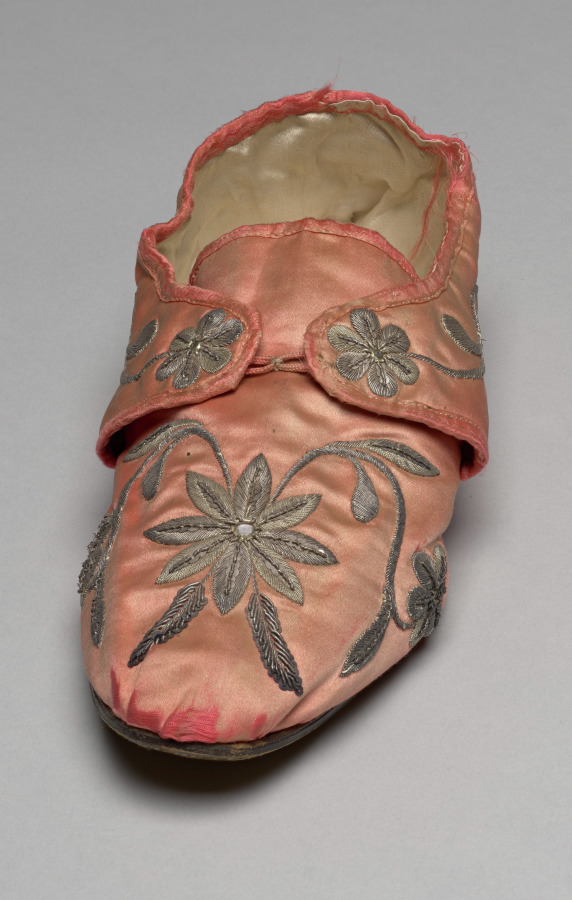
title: Slipper (one of a pair)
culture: Italy, Venice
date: early 1700s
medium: Silk: satin weave with silver metal thread embroidery and trim; spangles; leather soles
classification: Garment